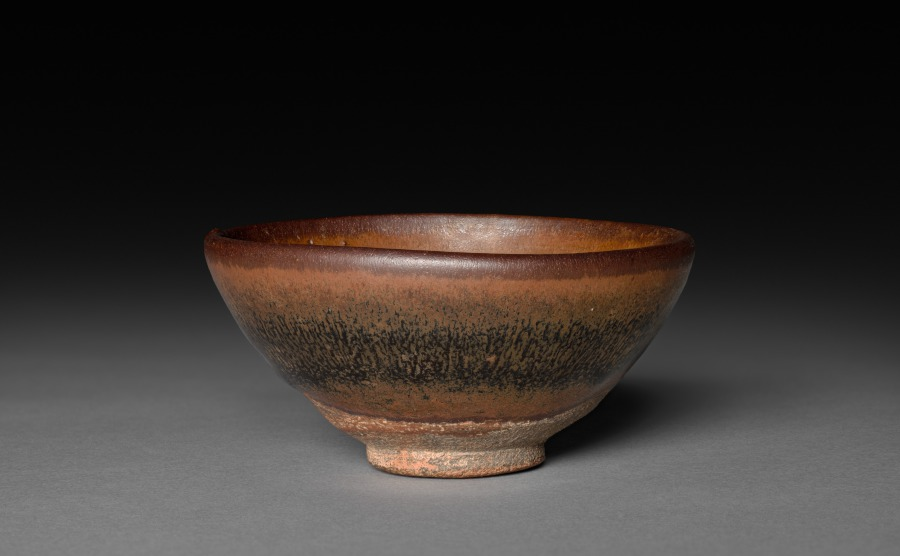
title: Tea Bowl: Jian ware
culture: China, near Shui ch'i, Song dynasty (960-1279)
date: 960–1279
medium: purplish brown stoneware with iron slip glaze coating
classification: Ceramic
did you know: Jian ware was very popular with the tea cultures in China and Japan.